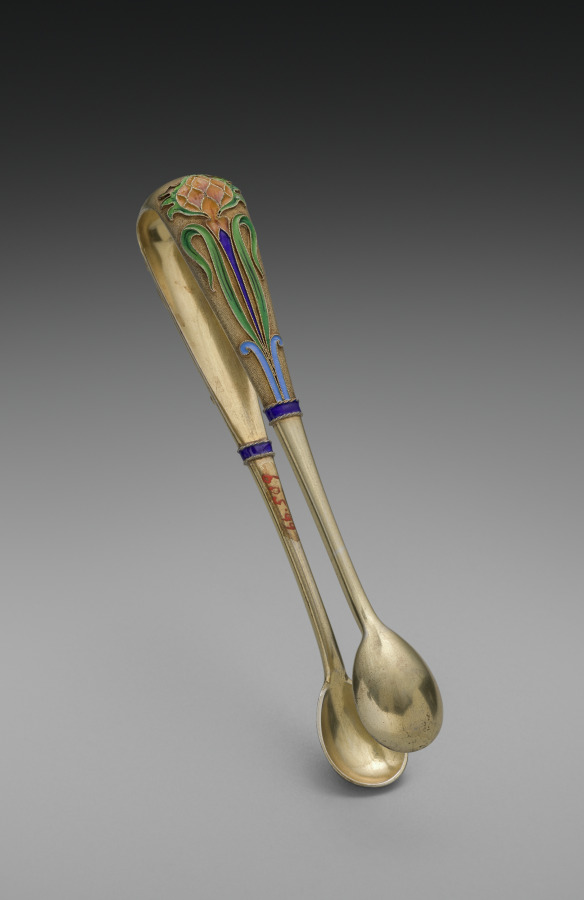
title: Sugar Tongs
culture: Russia, St. Petersburg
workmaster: attributed to Feodor Ivanovich Rückert (Russian, 1840–1917)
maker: House of Fabergé (Russian, 1842–1918)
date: 1887–96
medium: silver gilt, opaque cloisonné enamel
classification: Miscellaneous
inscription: 84, St. George? [assay mark for Moscow, 1882-1896]; C. Fabergé (in Cyrillic); double-headed eagle [imperial warrant]; 11494 scratched.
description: Fabergé’s craftsmen in Moscow, especially under the watchful eye of workmaster Feodor Rückert, became known for their work in the pan-Slavic or neo-Russian style, hearkening back to 17th-century motifs of Russian folk art. Often on rather conventional shapes, Rückert and his silversmiths created an explosion of color, achieved through the historic technique of cloisonné enamel in which tiny metal lines are soldered to the surface then filled with glass powders in various colors and fired to create a high gloss finish. The result is a spectacular evocation of the 17th-century originals. Far from mere copies, however, Rückert's designs, such as this tea service, employ naturalistic or abstract motifs in a thoroughly modern adaptation of a remarkable earlier period of Russian art and decoration.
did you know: These sugar tongs are part of a larger tea service.